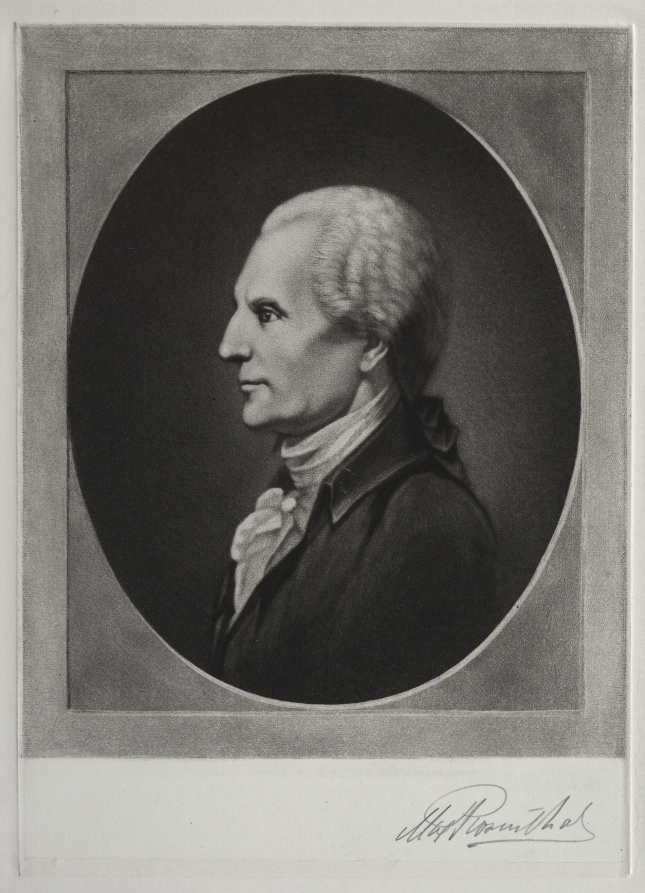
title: Richard Henry Lee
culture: America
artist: Max Rosenthal (American, 1833–1918)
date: c. 1900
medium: mezzotint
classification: Print